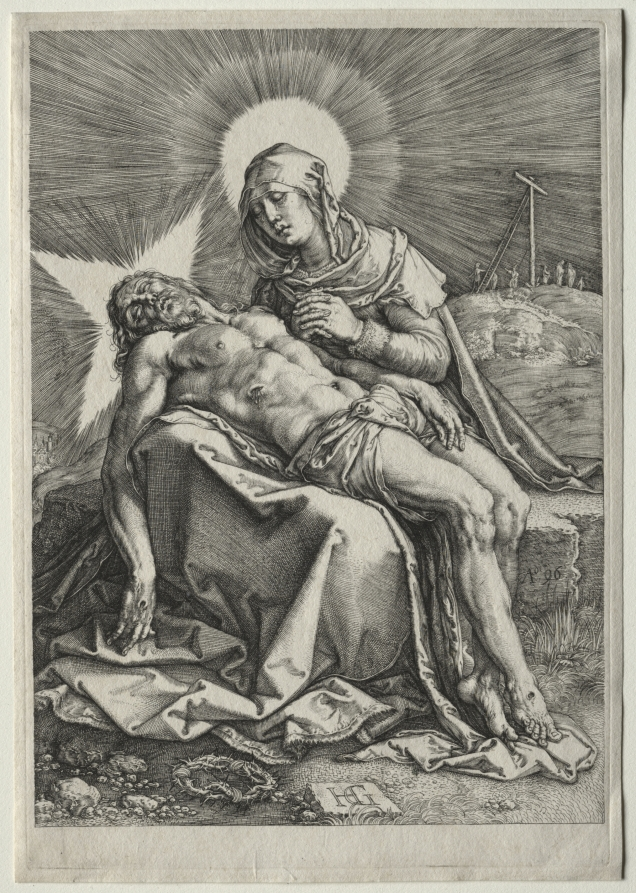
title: Pietà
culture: Netherlands, late 16th-early 17th century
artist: Hendrick Goltzius (Dutch, 1558–1617)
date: 1596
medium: engraving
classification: Print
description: Northern Renaissance responses to Italian art were often filtered through prints and other secondary sources while maintaining ties to regional artistic traditions. Dutch artist Hendrick Goltzius traveled to Italy in 1590–91 and developed an intense admiration for the work of Michelangelo. This print depicting a pietà may reflect his knowledge of Michelangelo’s sculpted Pietà while referencing prints from his native Holland.